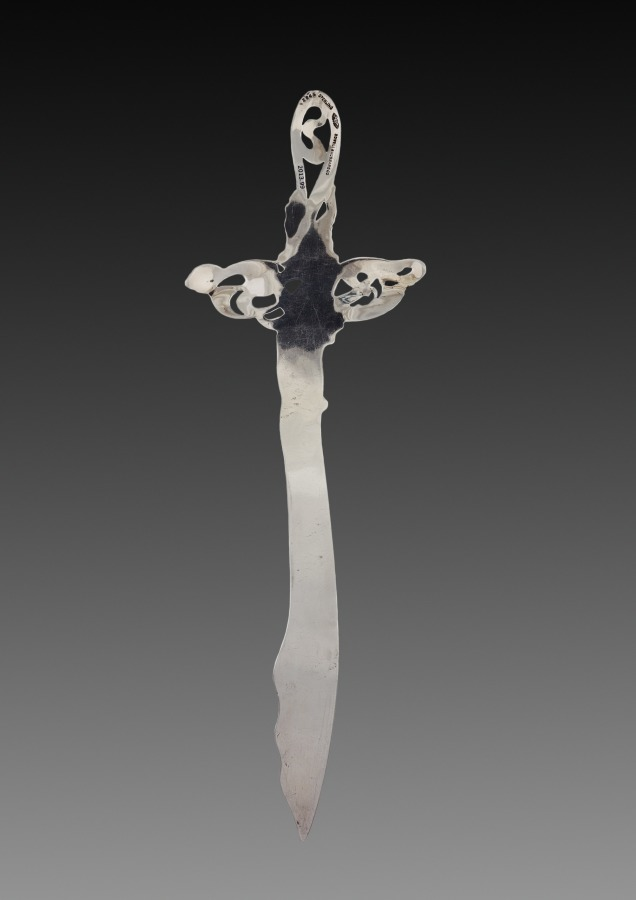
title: Paper Knife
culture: America, late 19th-early 20th century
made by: George W. Shiebler & Co. (American)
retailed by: Cowell and Hubbard Co. (American, Cleveland, 1879–1981)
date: c. 1900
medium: silver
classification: Metalwork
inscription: signed on reverse: 2045/Sterling/mark for Shiebler of wings flanking "S" in center for George Shiebler & Co., New York, New York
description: During the 1890s a new style emerged that reflected naturalistic and symbolic motifs found in Japanese and other Asian design. This movement rejected the historicism that had dominated architecture and design during the previous decades and took hold across Europe and America too. In France the style was known as "Art Nouveau," after the name of the gallery belonging to its chief proponent Siegfried Bing, the Maison de L'Art Nouveau (House of the New Art). This paper knife by the American silver company George W. Shiebler & Co. typifies Art Nouveau style with its flowing lines enveloping a young woman, revered as the ideal natural beauty. The composition resolves into a pointed dagger, suggesting a tragic end to life itself. Art Nouveau reached its apex at the 1900 world's fair in Paris, which was intended to herald the new century with a new style of art. However, critics and consumers alike soon rejected Art Nouveau as too sentimental in favor of newer motifs and styles as the moment passed. By 1905 it was all but forgotten.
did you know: This expressive Art Nouveau paper knife, or letter opener, was sold by the Cleveland jeweler Cowell and Hubbard around 1900.